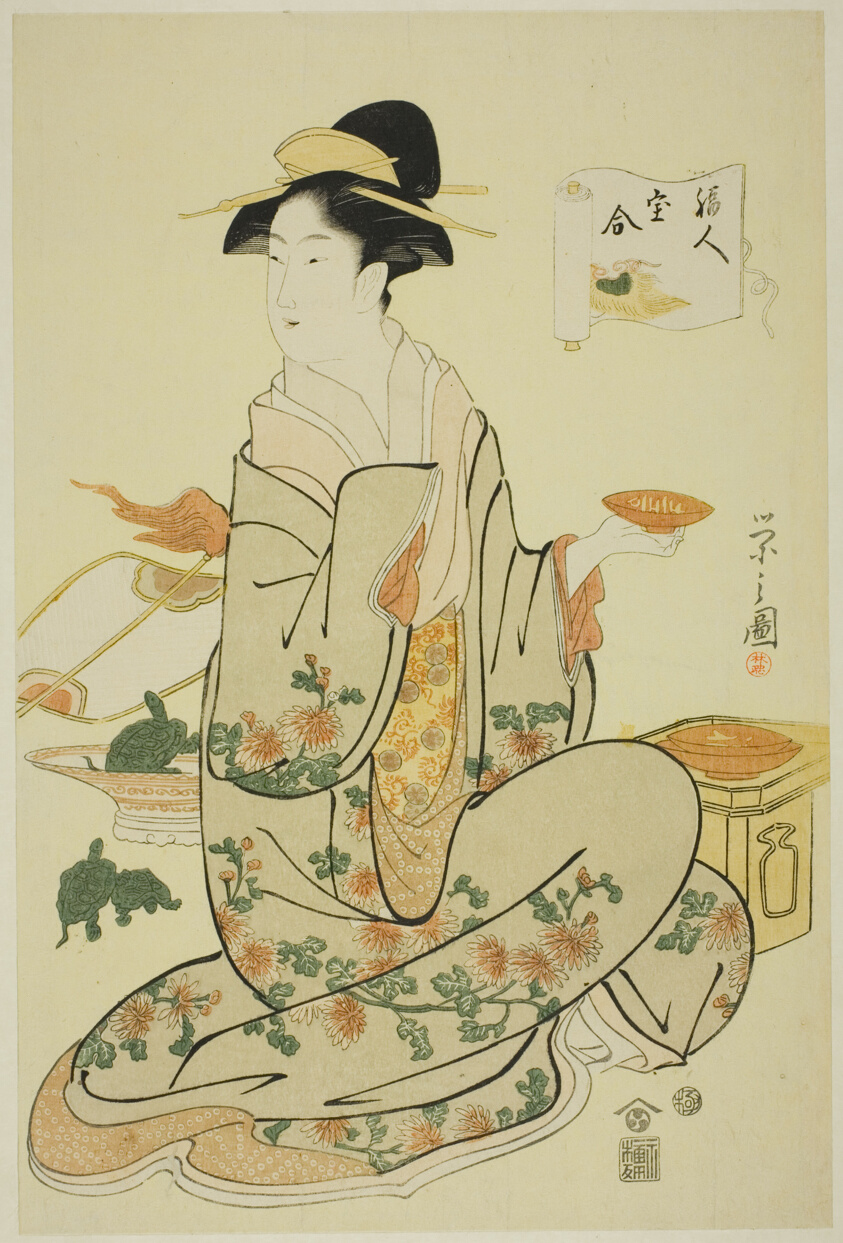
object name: Print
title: Jurojin, from the series "A Comparison of the Treasures of the Gods of Good Fortune (Fukujin takara awase)"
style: Japanese (culture or style)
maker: Chobunsai Eishi; Japanese, 1756-1829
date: c. 1795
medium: Color woodblock print; oban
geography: Japan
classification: woodblock print; print; asian art